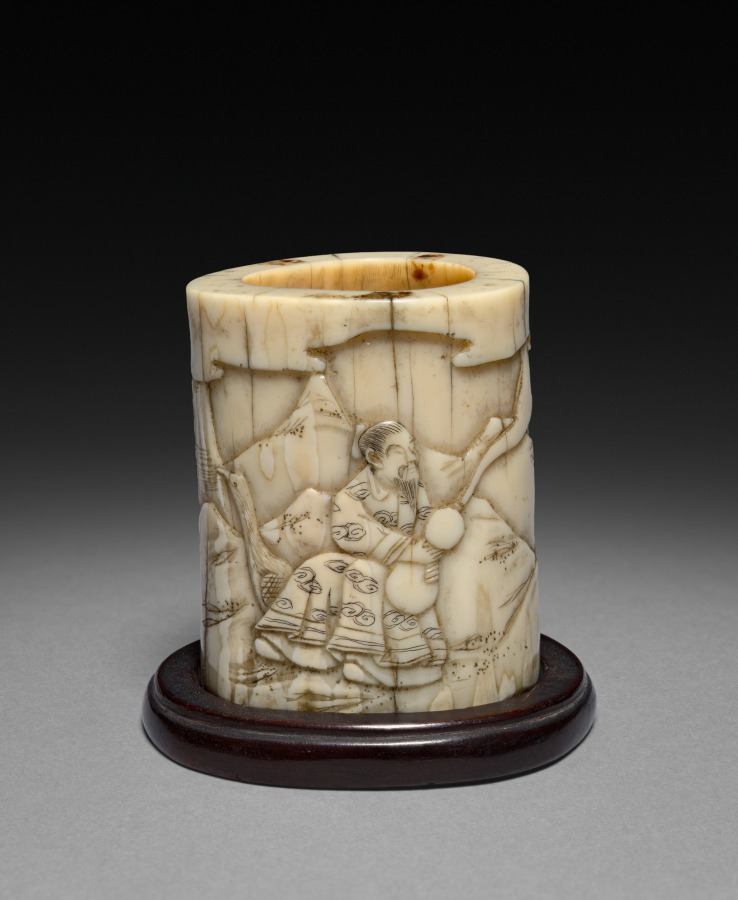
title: Carved Tusk with Chinese Immortal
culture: Japan, Meiji period (1868–1912)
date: c. 1868–1912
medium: Carved ivory with wood base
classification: Ivory